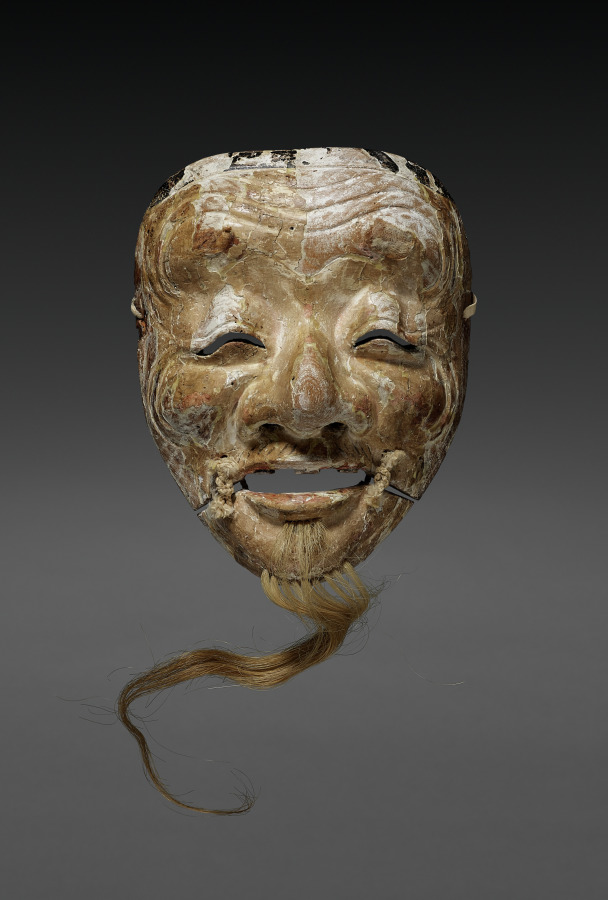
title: Noh Mask of Okina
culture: Japan, Muromachi period (1392–1573)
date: 1400s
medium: polychromed wood and hemp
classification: Sculpture